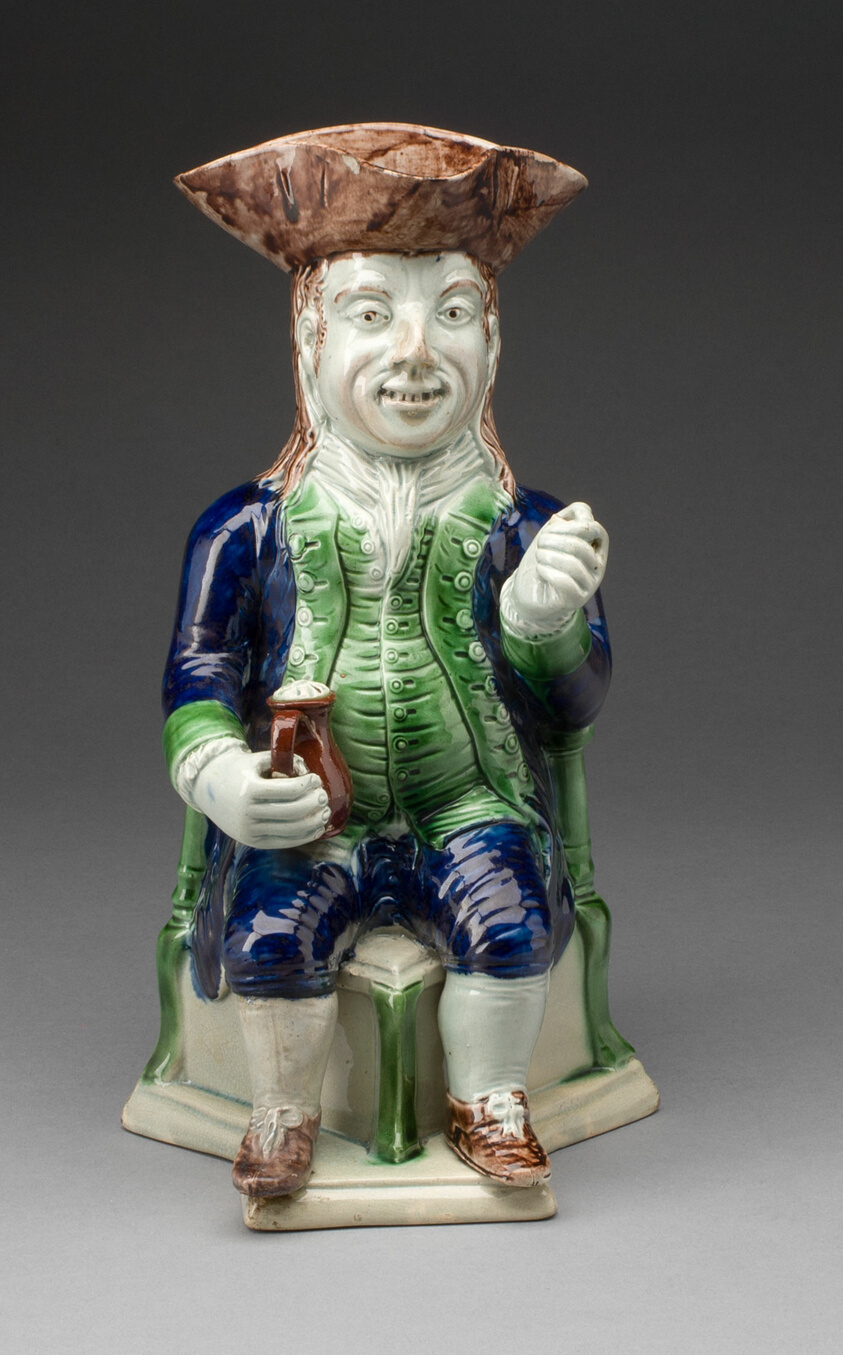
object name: Ceramics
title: Toby Jug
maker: England, Staffordshire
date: 1780/90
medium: Lead-glazed earthenware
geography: Staffordshire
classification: earthenware; lead-glazed earthenware; european decorative arts; ceramics